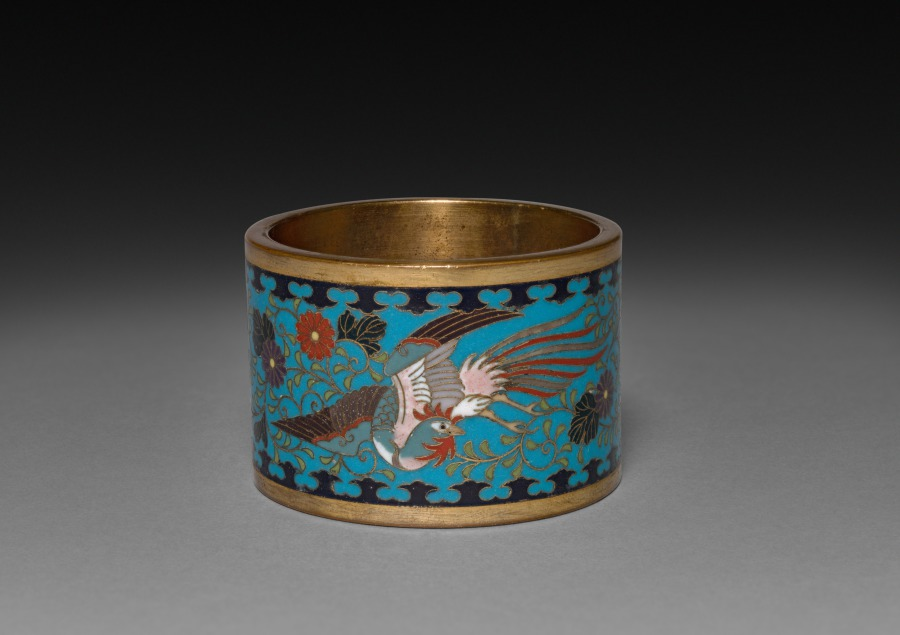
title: Napkin Ring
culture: Japan, Meiji period (1868–1912) to Taishō period (1912–26)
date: early 1900s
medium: One of a pair; cloisonne enamel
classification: Enamel